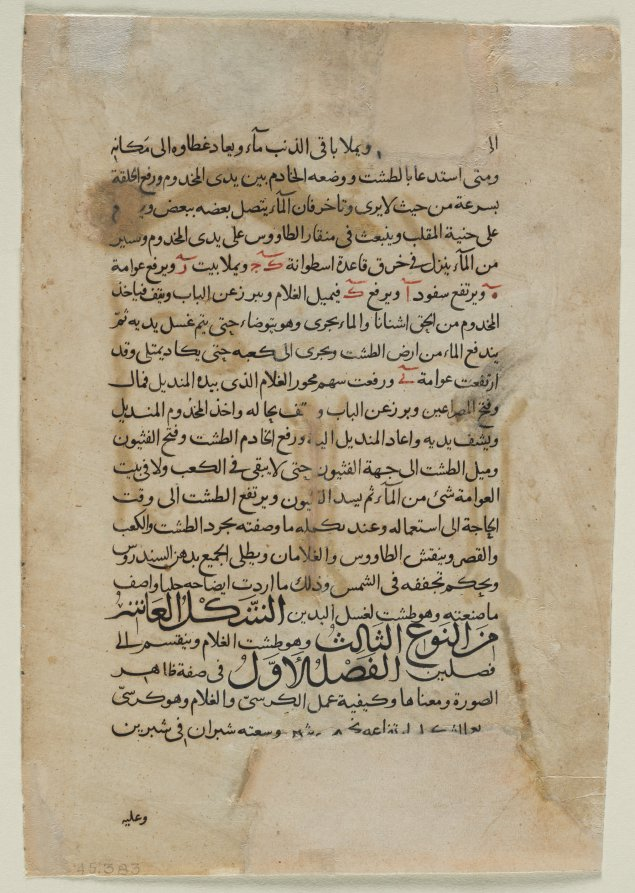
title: Text Page, Arabic Prose (verso) Text from The Book of Knowledge of Ingenious Mechanical Devices (Automata) of Inb al-Razza al-Jazari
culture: Syria, Damascus, Mamluk Period, 14th Century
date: 1315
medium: ink and opaque watercolor on paper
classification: Manuscript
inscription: script: Naskh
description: The Arabic title of this work is Kitab fi ma'rifat al-hiyal al handasiyya (The Book of Knowledge of Ingenious Mechanical Devices). According to the description of the device illustrated on the other side of this page, the peacock is filled with water: as it flows into the vessel below, it raises a float that opens a door in the section above, causing the little figure to move forward offering soap; as more water flows, a second door will open and another figure will move forward offering a towel. Finally, the dirty water is drawn off by means of a spigot.